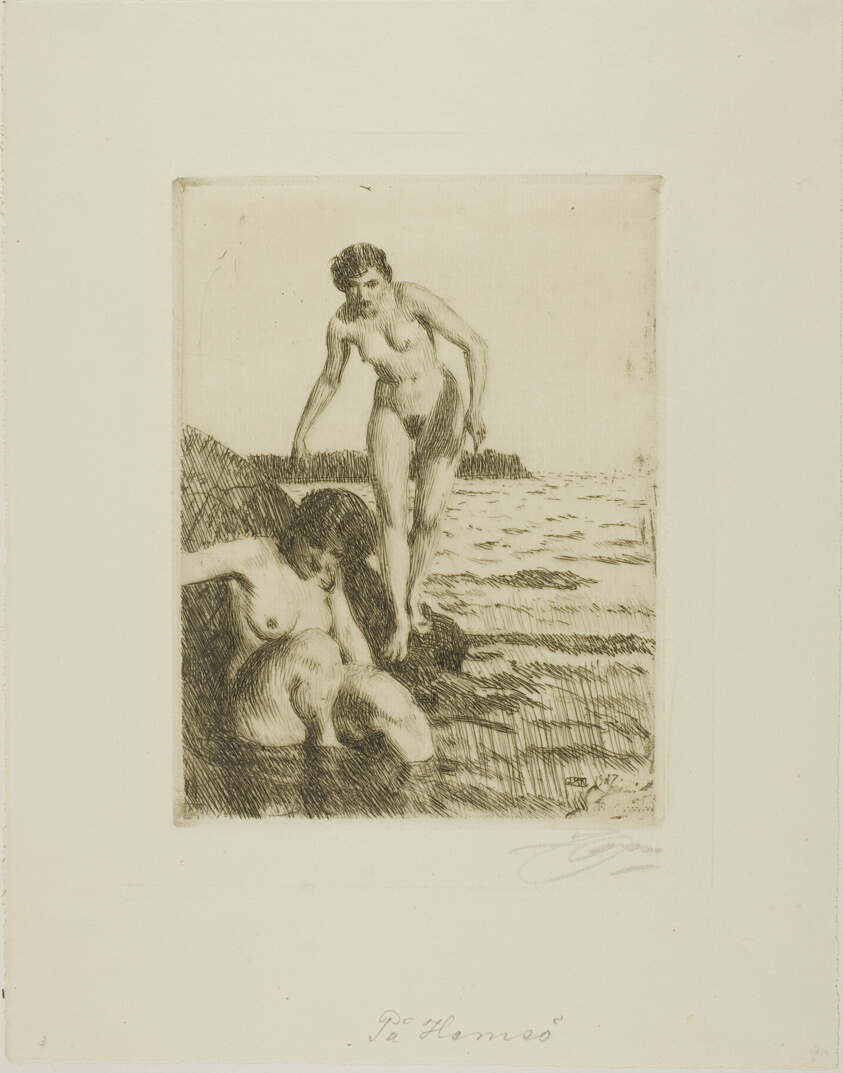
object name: Print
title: On Hemsö Island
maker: Anders Zorn (Swedish, 1860-1920)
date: 1917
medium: Etching on ivory laid paper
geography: Sweden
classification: etching; print; prints and drawing